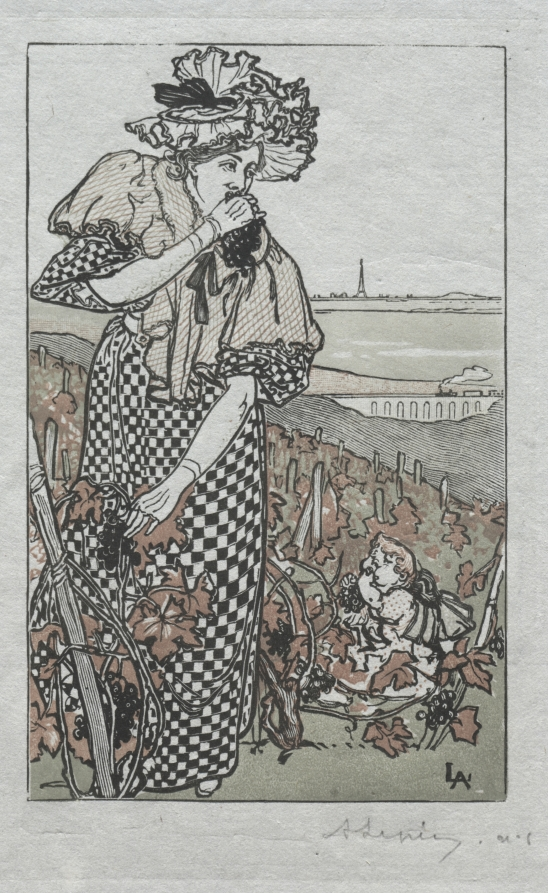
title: Paris Almanac, 1897: Autumn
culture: France, late 19th Century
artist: Auguste Louis Lepère (French, 1849–1918)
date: 1897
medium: wood engraving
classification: Print